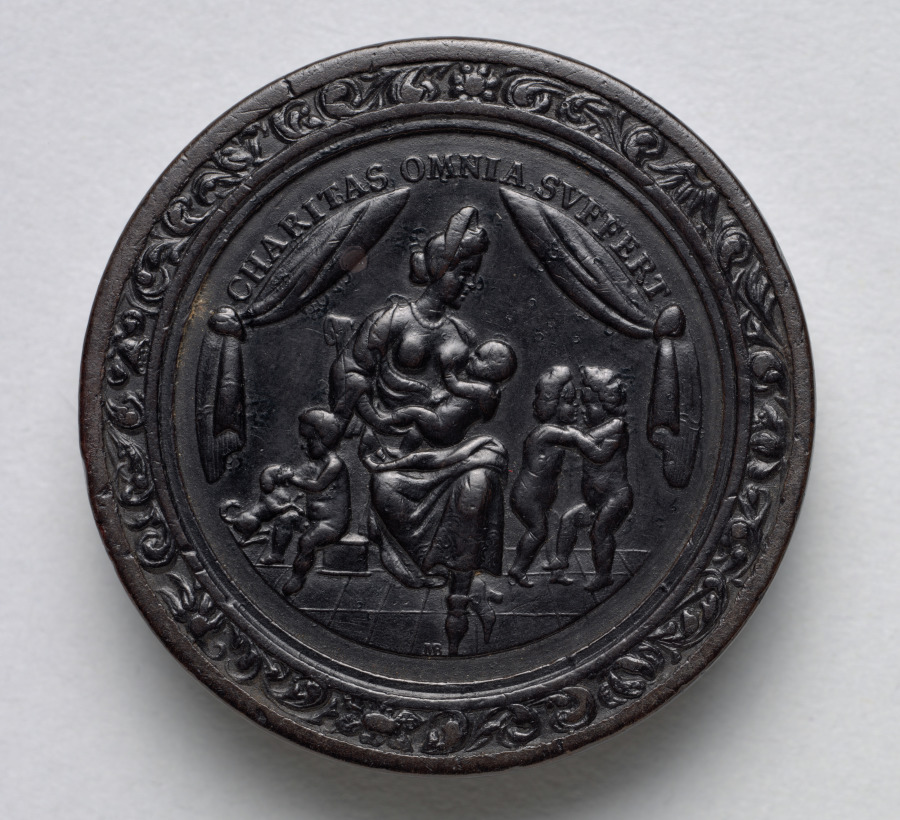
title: Gaming Piece (reverse)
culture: Germany, late 17th-early 18th Century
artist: Martin Brunner (German, 1659–1725)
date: c.1700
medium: wood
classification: Furniture and woodwork